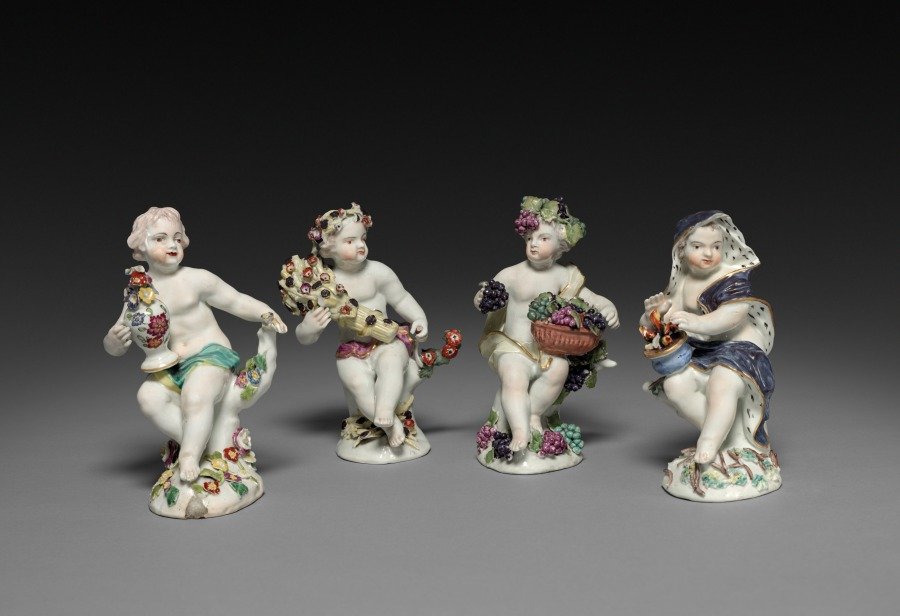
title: Spring; Summer; Autumn; Winter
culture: England, Derby, 18th century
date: c. 1760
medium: soft-paste porcelain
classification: Ceramic